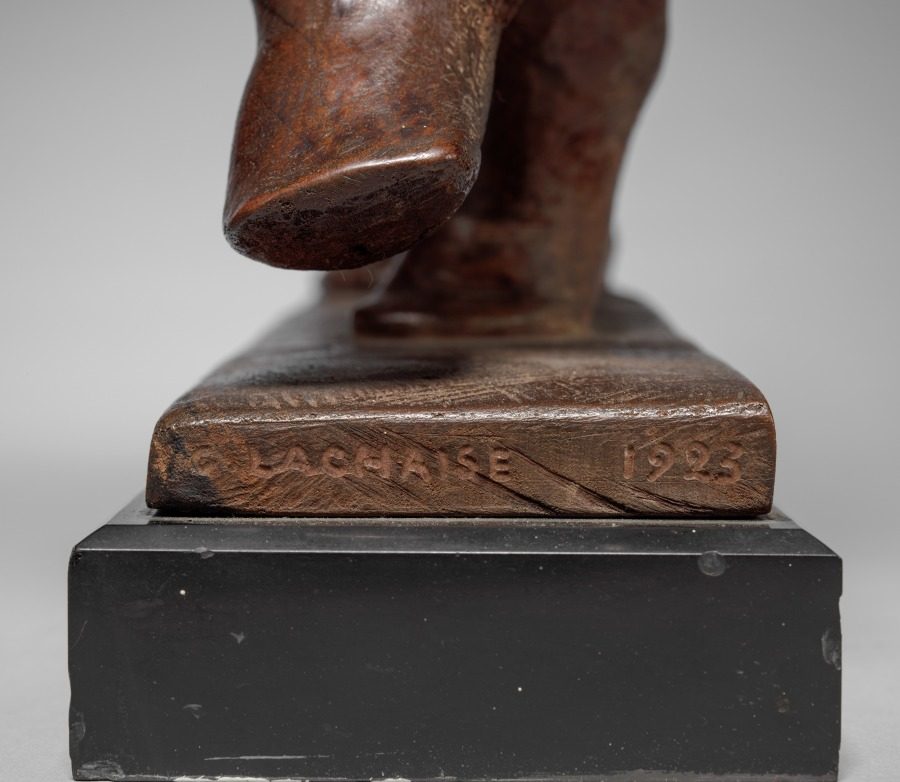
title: Dancing Children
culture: America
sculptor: Gaston Lachaise (American, born France, 1882–1935)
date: 1923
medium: wood with traces of gilt and polychrome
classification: Sculpture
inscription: Signed on right end of base: G. LACHAISE 1923